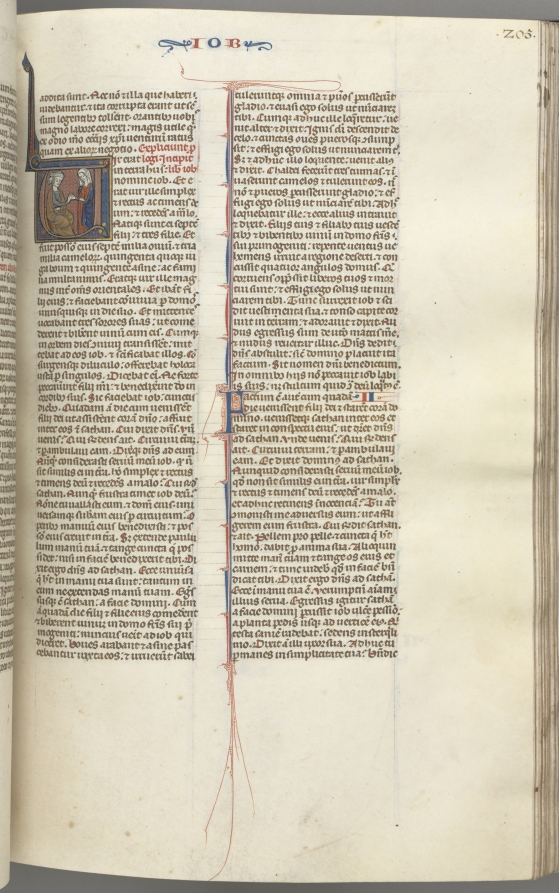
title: Fol. 205r, Job, historiated initial V, Job on the dungheap given a gold earring by one of his sisters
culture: Southern France, Toulouse(?), 13th century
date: c. 1275–1300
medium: ink, tempera and gold on vellum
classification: Bound Volume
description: Biblical manuscripts were highly prized and important possessions of churches, monasteries, cathedral schools, and universities throughout medieval Europe. The biblical texts were known as the vulgate, the translations made by Saint Jerome in the fourth century from Hebrew and Greek into Latin, which became the definitive and official Latin version of the Roman Church. In the 13th century, the bible was, for the first time, produced as a single volume with an officially sanctioned sequence to its books and chapters as illustrated by this example. The very extensive decoration of this bible is arranged hierarchically to indicate the relative importance of the various texts so that full or almost full-page initials mark the openings of the first prologue, Genesis, and the first Gospel; historiated initials mark the beginning of each book and illuminated initials mark the Prologues.